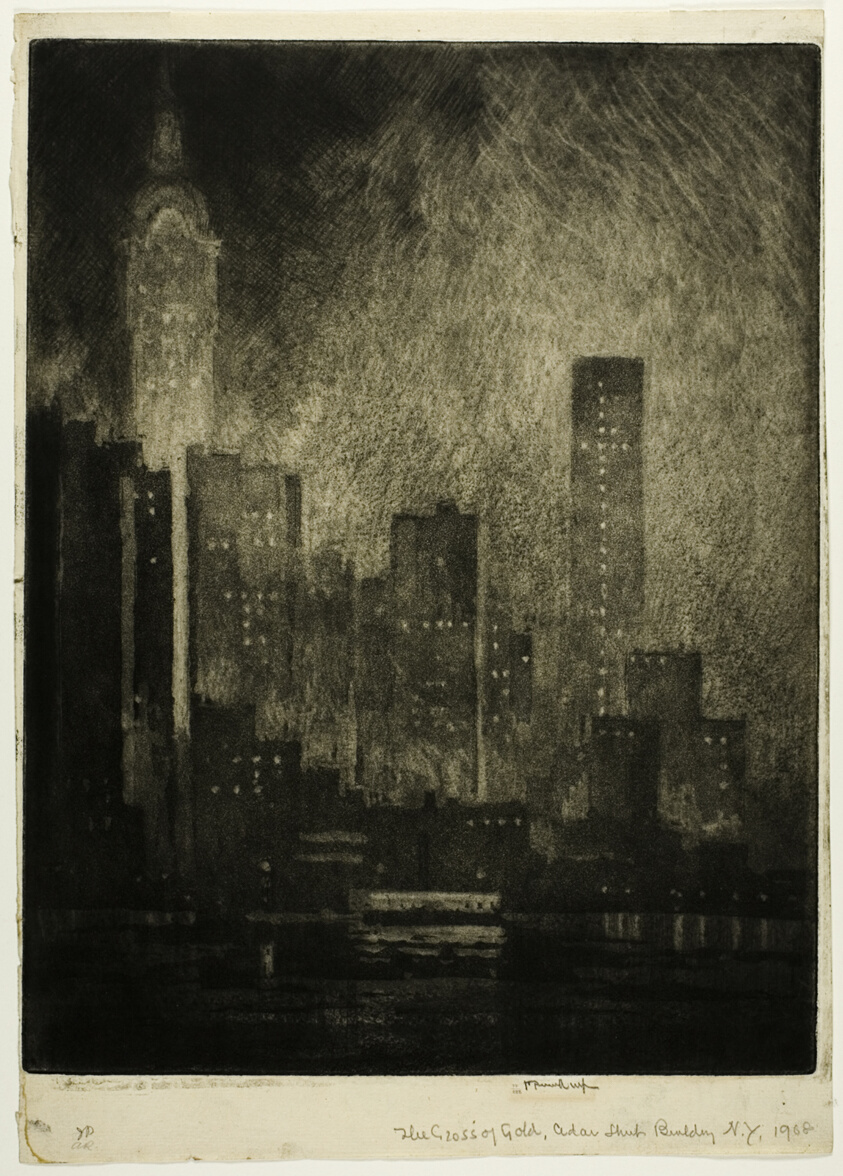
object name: Print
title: The Cross of Gold, Cedar Street Building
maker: Joseph Pennell (American, 1857-1926)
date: 1908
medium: Sandpaper mezzotint on ivory laid paper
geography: United States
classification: mezzotint; print; prints and drawing